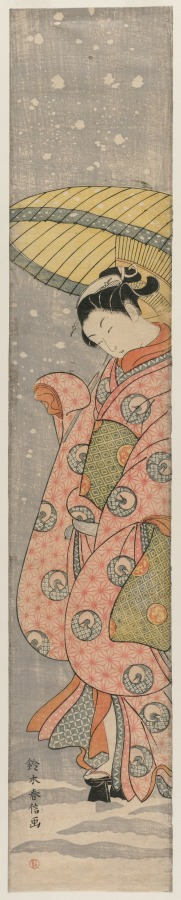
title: Young Woman Standing Under an Umbrella in the Snow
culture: Japan, Edo period (1615–1868)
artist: Suzuki Harunobu (Japanese, 1724–1770)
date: 1767–68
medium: Woodblock print; ink and color on paper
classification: Print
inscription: Signature: Suzuki Harunobu ga.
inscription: Collector's seal: Vever.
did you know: Pillar prints, or hashira-e (柱絵), are long and narrow Japanese woodblock prints originally intended to decorate wooden pillars.